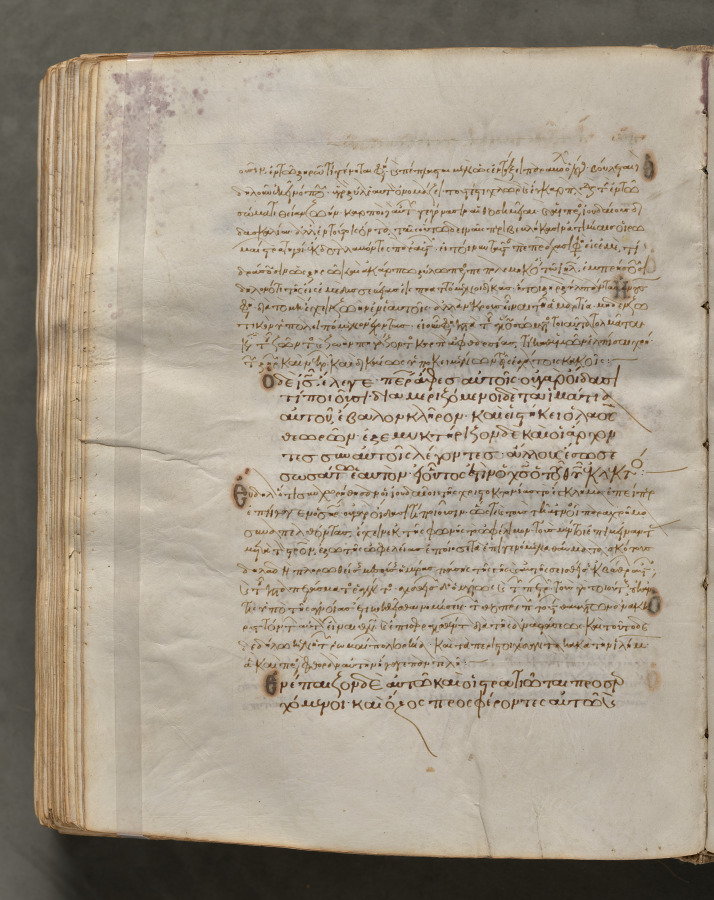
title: Text, folio 315 (verso), from a Gospel Book with Commentaries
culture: Byzantium, Constantinople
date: c. 1000–1100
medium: ink, tempera, and gold on vellum; leather binding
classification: Bound Volume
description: Each of the four gospels in this book opens on a page with brilliantly illuminated borders depicting the author of the text as well as birds—principally peacocks, symbols of the immortality of the soul—and fountains, representing the fountain of life and the salvation of the soul. This volume consists of 428 leaves with texts in Greek. Its level of sophistication suggests that it was probably written and decorated in a monastery in Constantinople.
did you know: Gospel books were carried in procession through Byzantine churches.